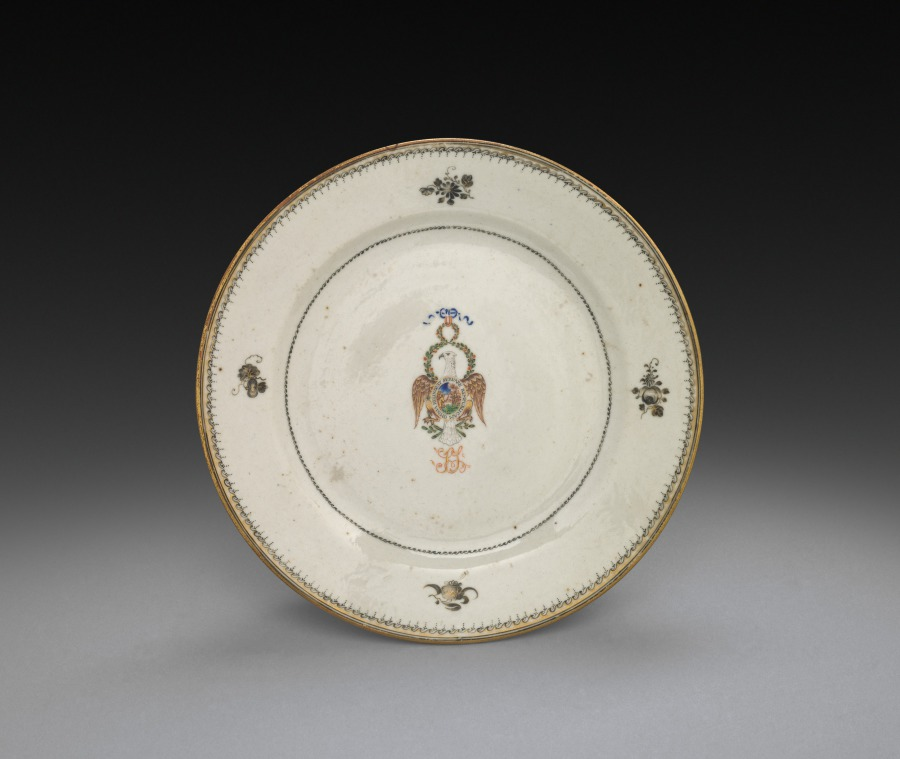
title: Plate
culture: China, Chinese Export, 18th century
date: c. 1790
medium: porcelain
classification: Ceramic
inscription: on front in center: initials S.S. above the badge of the Order of the Cincinnati.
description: From a service made for Samuel Shaw.